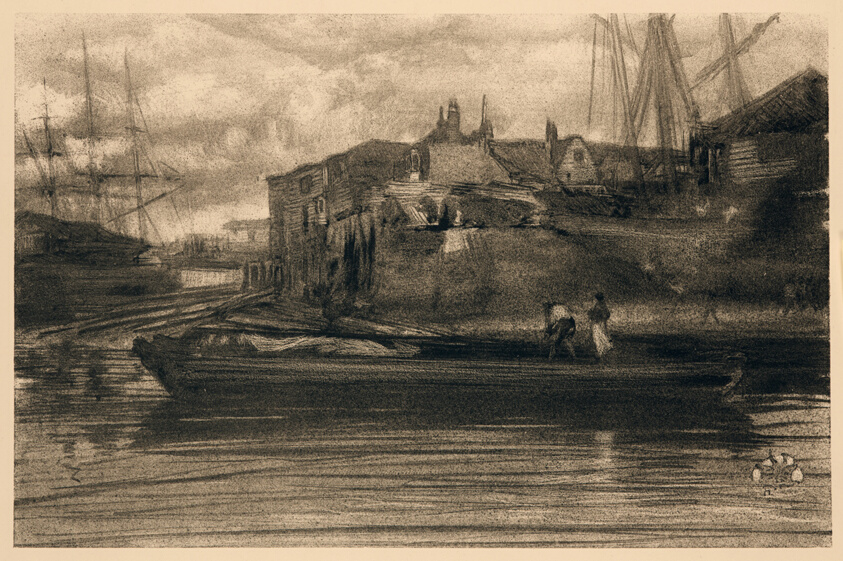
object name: Print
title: Limehouse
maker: James McNeill Whistler (American, 1834-1903)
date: 1878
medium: Lithotint in black ink with scraping and incising, on a prepared half-tint ground, on off-white plate paper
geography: United States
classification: lithotint; lithograph; print; prints and drawing; paper